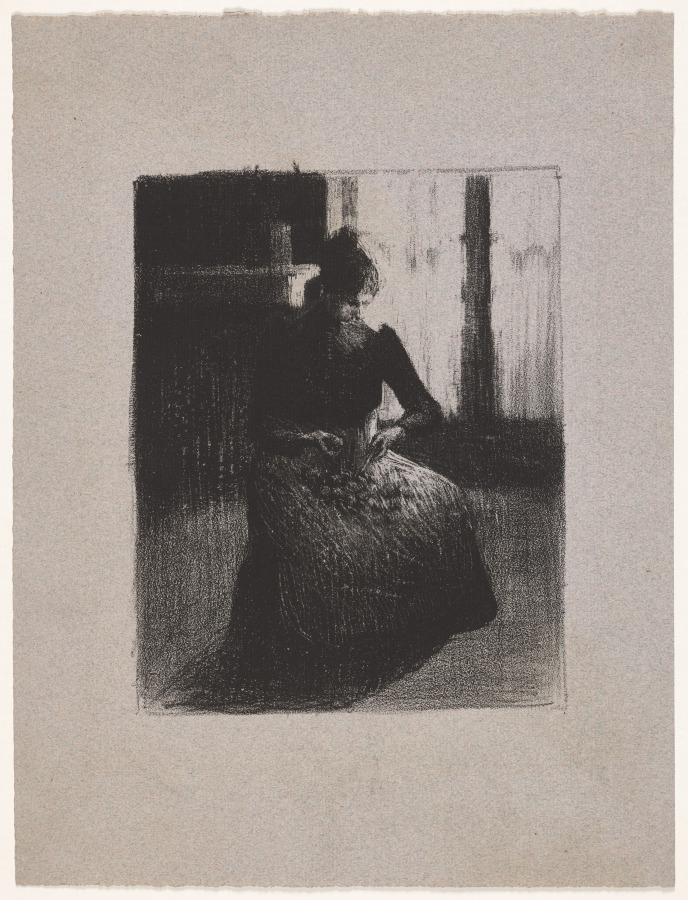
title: The Potato Peeler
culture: France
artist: Ker Xavier Roussel (French, 1867–1944)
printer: Edward Ancourt (French, 1841–1898?)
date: 1893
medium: lithograph on gray laid paper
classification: Print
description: This print presents the type of domestic scene that Ker-Xavier Roussel and his Nabi colleagues favored during the 1890s. Artists in this circle used simplified forms and bold color to depict subject matter drawn from contemporary Paris, both domestic and public. Created in the year that Roussel married Marie, the sister of his close friend Édouard Vuillard, this lithograph may be a portrait of his new wife. The figure appears fully absorbed in her task, but also completely isolated from the outside world in starkly contrasting light and dark tones.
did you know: This print is the first of several in which Ker-Xavier Roussel collaborated with renowned master printmaker Edward Ancourt.